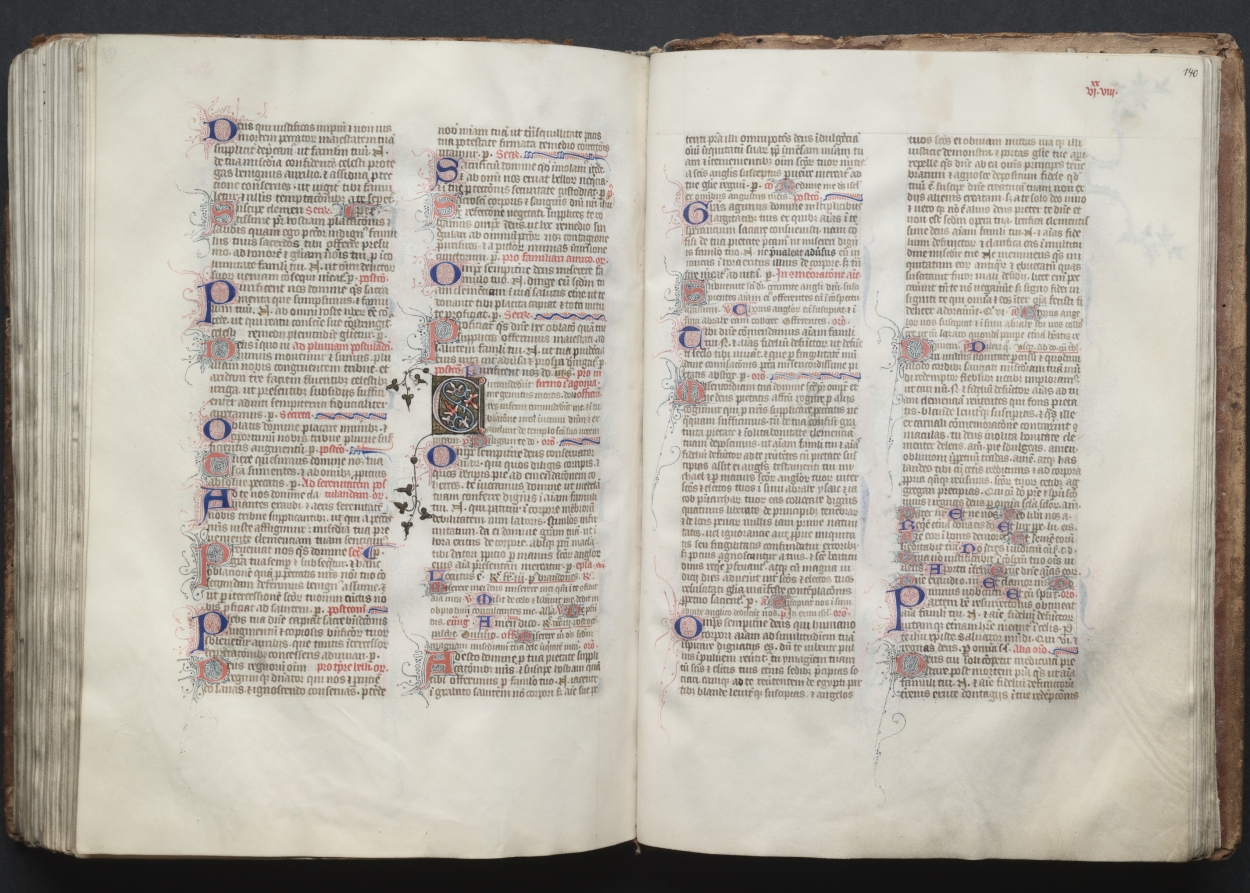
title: The Gotha Missal: Fol. 140r, Text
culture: France, Paris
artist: Master of the Boqueteaux (French)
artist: and Workshop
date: c. 1375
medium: ink, tempera, and gold on vellum; blind-tooled leather binding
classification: Bound Volume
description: The style and quality of this manuscript's decoration is typical of deluxe Parisian books made for aristocratic or royal patrons. Most of the book's decoration appears to be the work of the Master of the Boqueteaux, an artist active at the court of King Charles V (died 1380). His style was apparently shared by a number of book illuminators working in and around Paris. It is very possible that the Gotha Missal belonged to Charles V, but is not provable because the manuscript has no royal portraits and lacks a colophon. Given the book's magnificent decoration, however, it would seem that it was produced for a Valois prince, if not for the king himself. The manuscript receives its name from the German dukes of Gotha, its later owners.